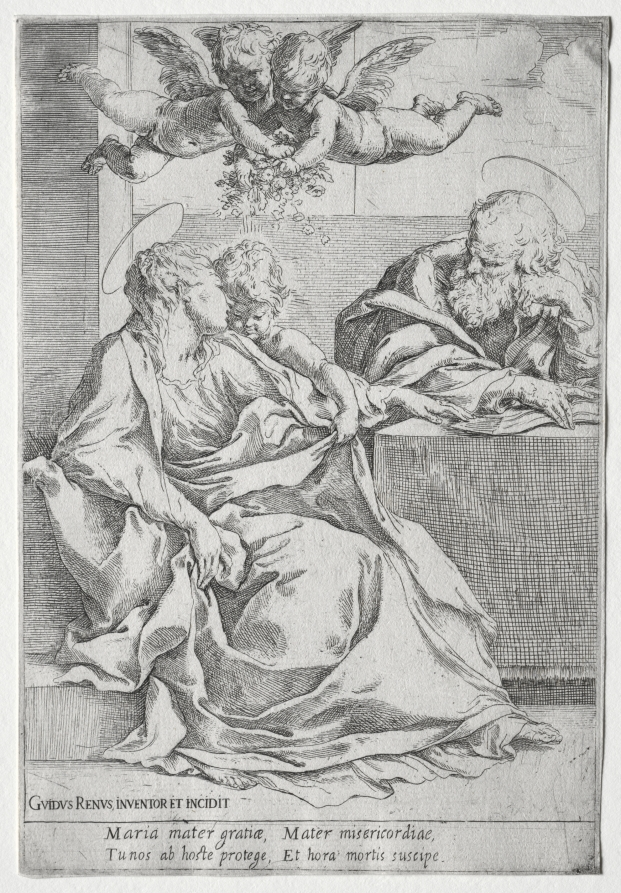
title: The Holy Family with Two Angels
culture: Italy, 17th century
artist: Guido Reni (Italian, 1575–1642)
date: c. 1590–1610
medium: etching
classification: Print